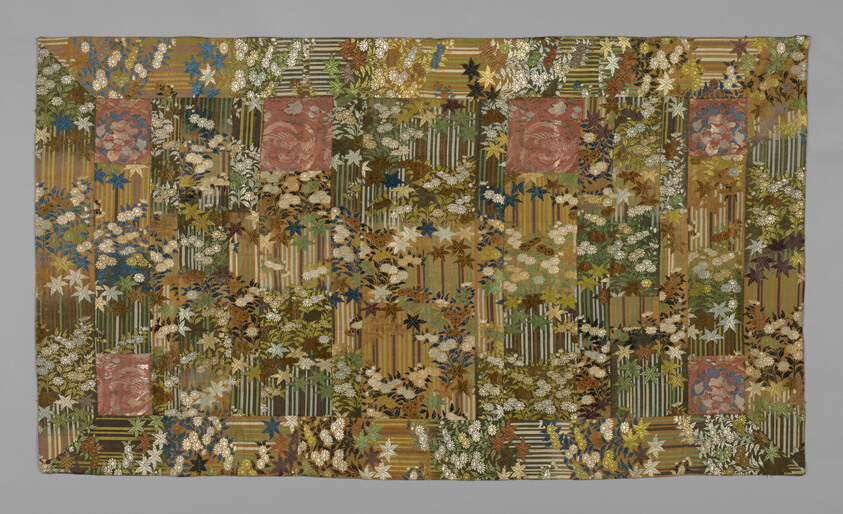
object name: Textile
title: Kesa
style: edo (japanese period)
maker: Japan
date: late Edo period (1789–1868), late 18th/early 19th century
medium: Silk, warp ikat, warp-float faced 2:1 'Z' twill weave with supplementary brocading wefts; patches: silk, gold-leaf-over-lacquered-paper strip, warp-float faced 2:1 'Z' twill weave with weft-float faced 1:2 'Z' twill interlacings of secondary binding warp and supplementary patterning wefts; lined in 4:1 satin damask weave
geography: Japan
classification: textile; weaving; liturgical - buddhist; costume